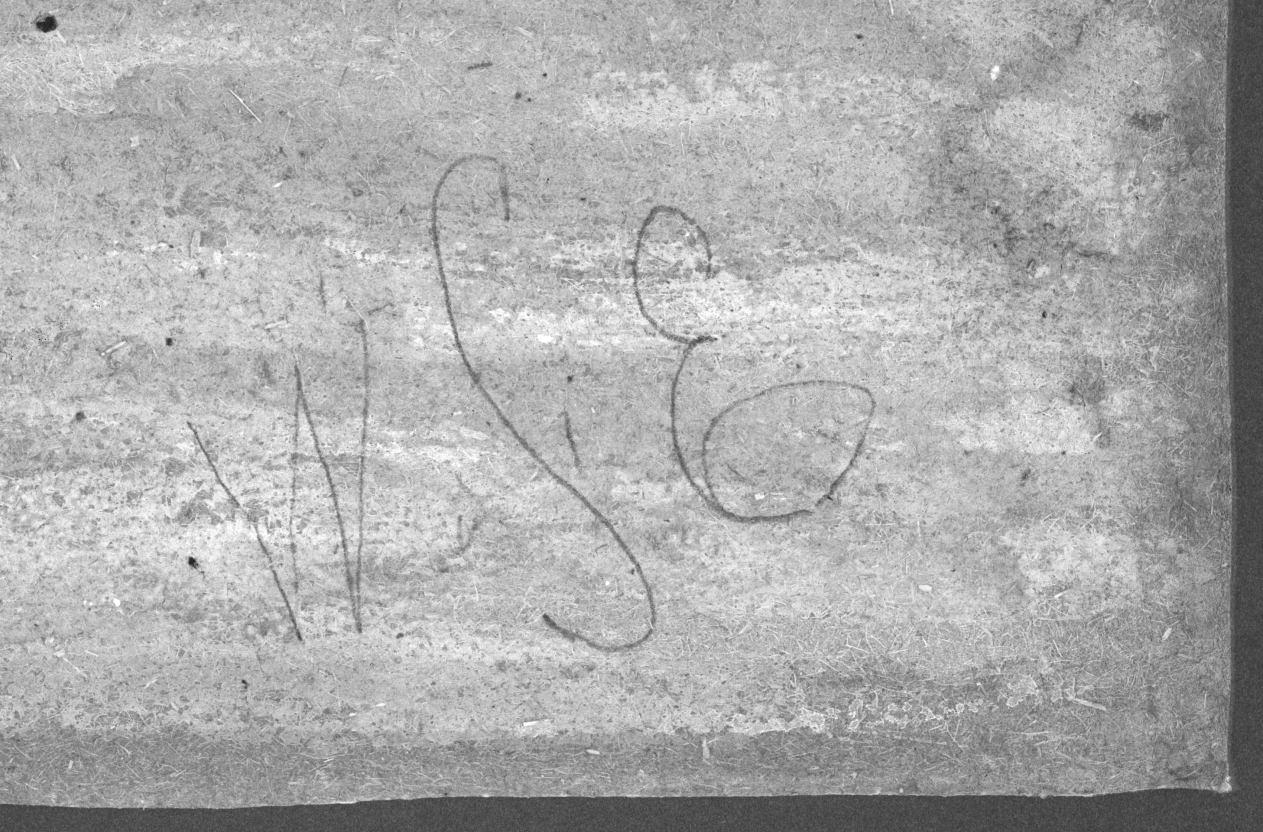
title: Bolton Abbey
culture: England, 19th century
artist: David Cox (British, 1783–1859)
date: c. late 1840s-1857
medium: watercolor with black chalk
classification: Drawing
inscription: inscribed, at lower right, in graphite: WSE; in white chalk on wood backing: June 8-03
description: This moody, broadly painted watercolor on rough, brown paper is emblematic of David Cox’s late style. Velvety grays and greens throughout the composition shift almost imperceptibly and streaks of blue wash, describing the distant hills and sky, are pierced by a sliver of brilliant yellow at the horizon. The ruined 12th-century priory is relegated to the background, nearly lost in the twilight.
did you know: The neighborhood where Bolton Abbey was found was one of David Cox's favorite places to paint and the church appeared as a subject throughout his works from about 1828 through 1857.